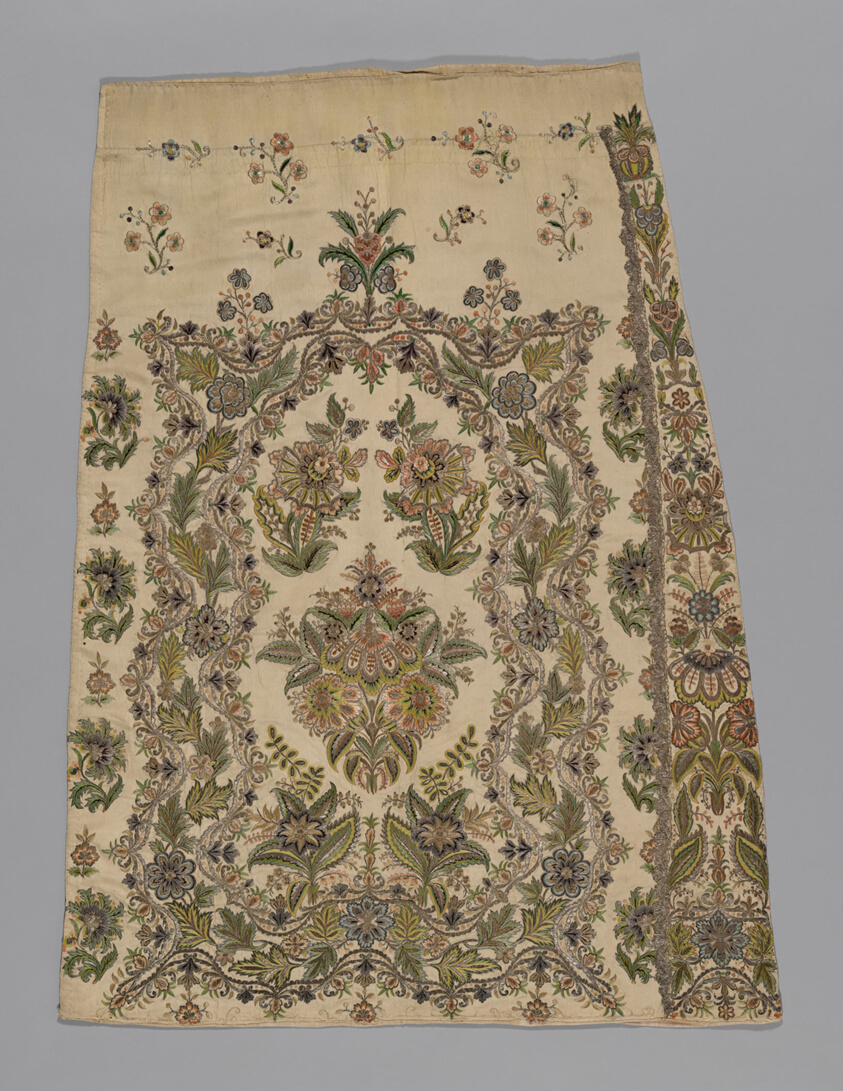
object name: Textile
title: Two Panels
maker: France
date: 18th century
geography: France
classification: textile; needlework (visual works)